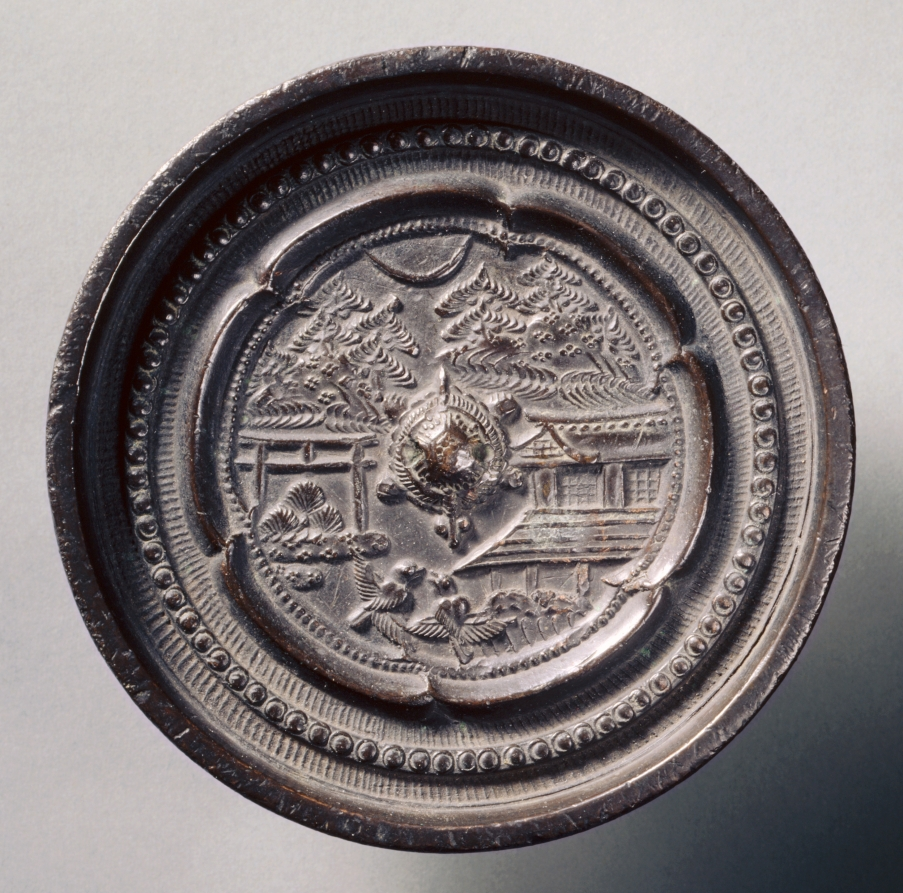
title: Mirror with a Tortoise Knob and Magpies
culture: Japan, Edo period (1615–1868)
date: 1600s to mid-1800s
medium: bronze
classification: Metalwork